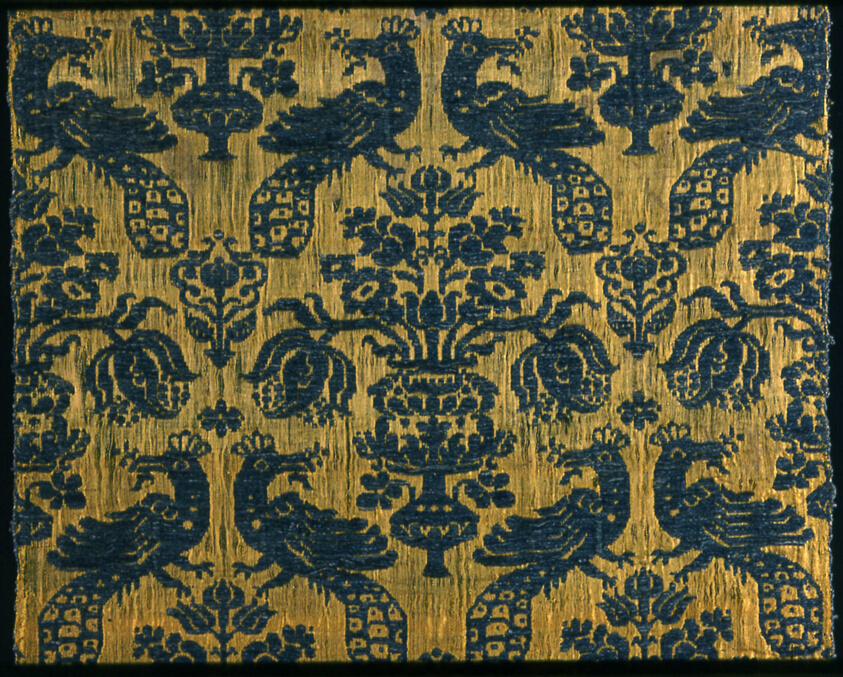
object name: Textile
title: Panel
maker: Italy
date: 16th/17th century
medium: Silk and cotton, plain weave; tied and free double cloth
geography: Italy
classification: textile; weaving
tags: birds, animals, flowers